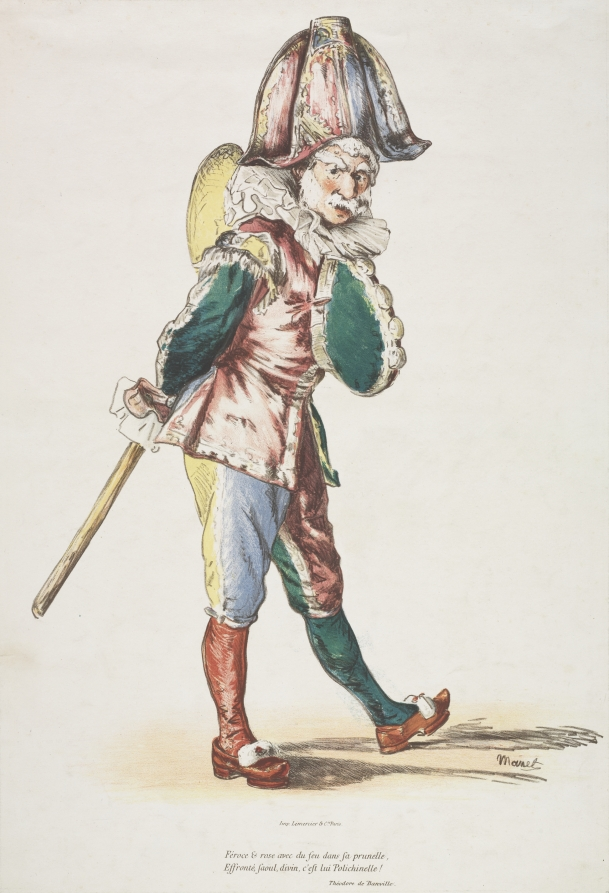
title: Polichinelle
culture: France, 19th century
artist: Édouard Manet (French, 1832–1883)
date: 1876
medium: lithograph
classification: Print